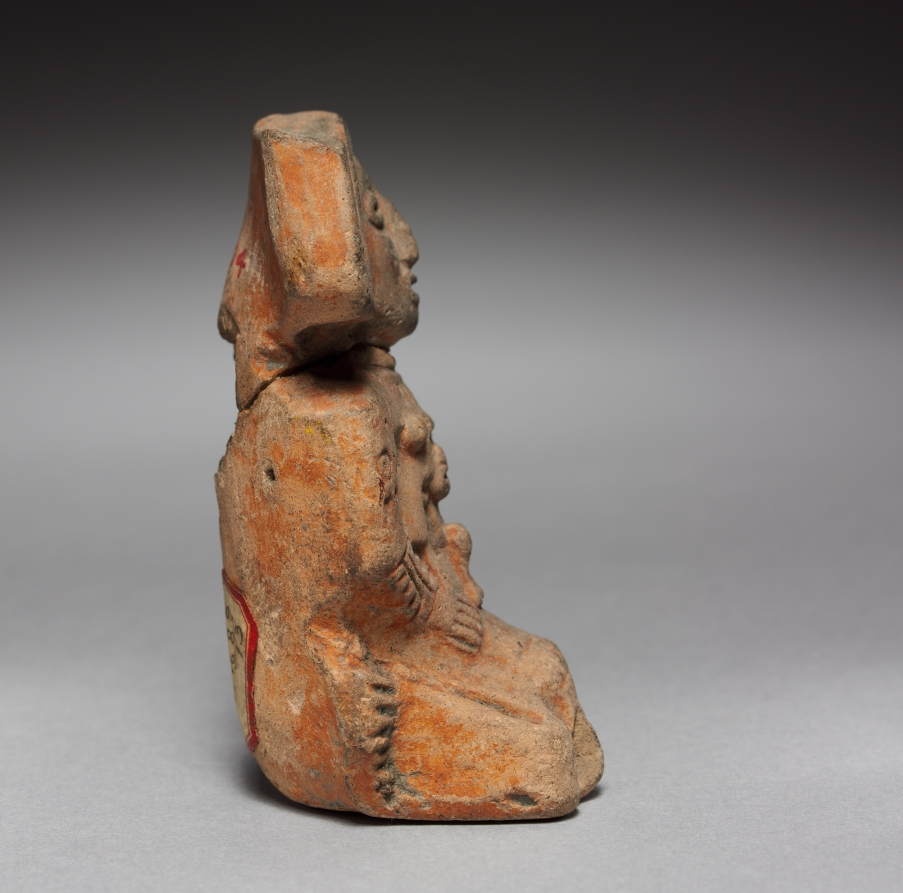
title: Figurine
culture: Mexico, Aztec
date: 1325–1521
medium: pottery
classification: Ceramic